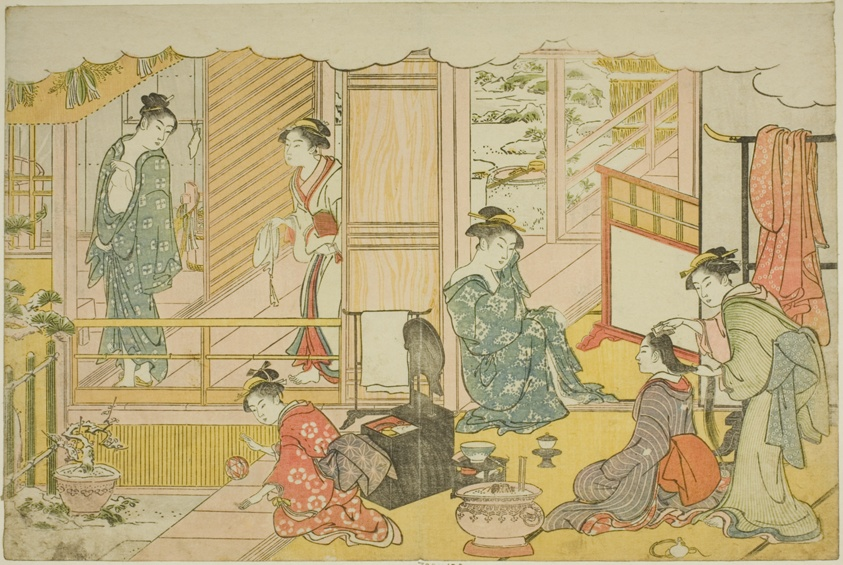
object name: Print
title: The First Bath of the New Year (Yudono hajime), from the illustrated book "Colors of the Triple Dawn (Saishiki mitsu no asa)"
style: Japanese (culture or style)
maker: Torii Kiyonaga (Japanese, 1752-1815)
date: c. 1787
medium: Color woodblock print; oban, page from an illustrated book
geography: Japan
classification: woodblock print; print; asian art